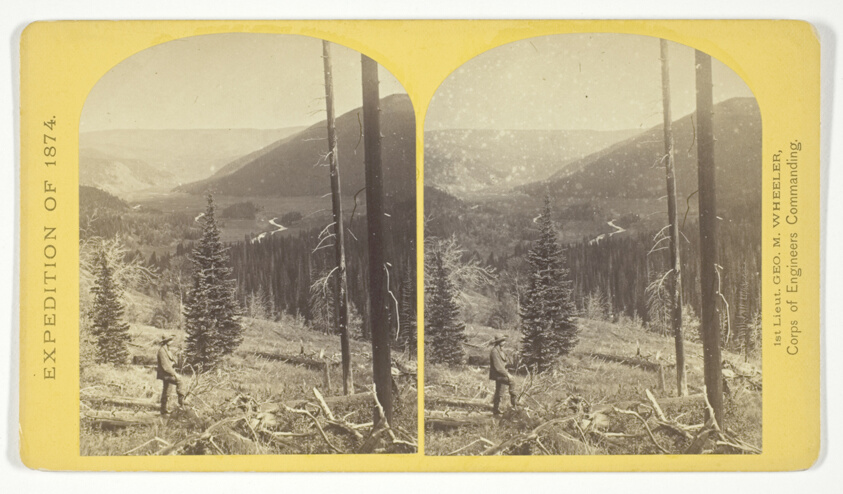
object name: Photograph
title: Cañon, Valley of the Conejos River, looking south from vicinity of "Lost Lakes", No. 36 from the series "Geographical Explorations and Surveys West of the 100th Meridian"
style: 19th century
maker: Timothy O'Sullivan (American, born Ireland, 1840–1882); commissioned by George Wheeler for the War Department, Corps of Engineers, U.S. Army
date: 1874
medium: Albumen print, stereo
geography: United States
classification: stereograph (albumen); photography; photograph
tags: Collected by Hugh Edwards, Geographical Explorations and Surveys